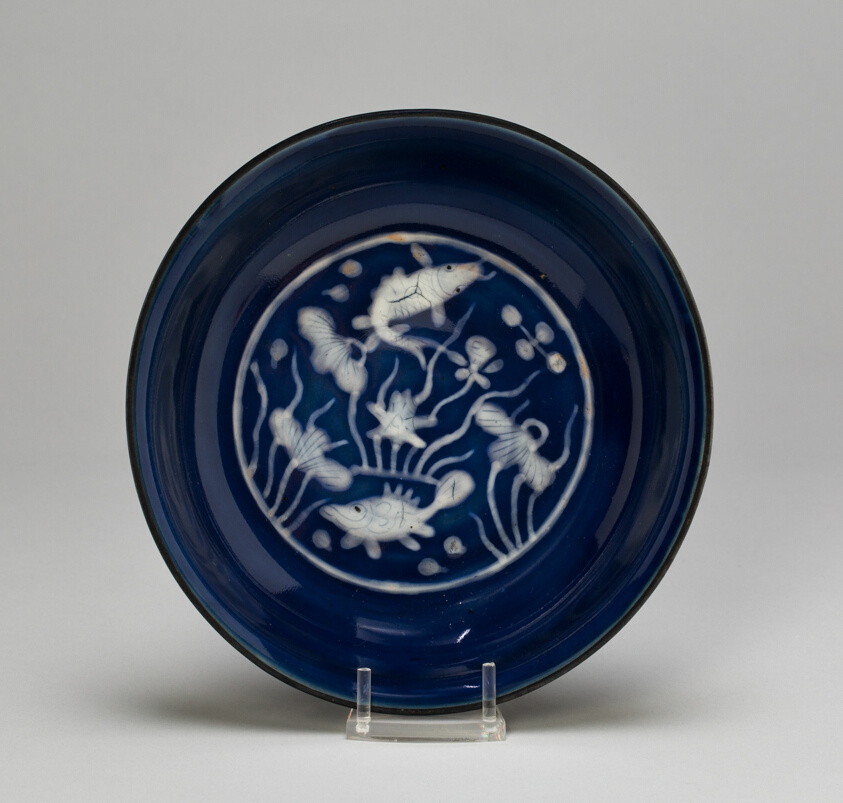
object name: Vessel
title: Dish with Fish Swimming in Lotus Pond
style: Chinese (culture or style)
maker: China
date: Ming dynasty (1368–1644), Wanli reign mark and period (1573–1620)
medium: Porcelain painted in underglaze blue with reserve decoration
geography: China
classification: dish (vessel); porcelain; asian art; ceramics; vessel